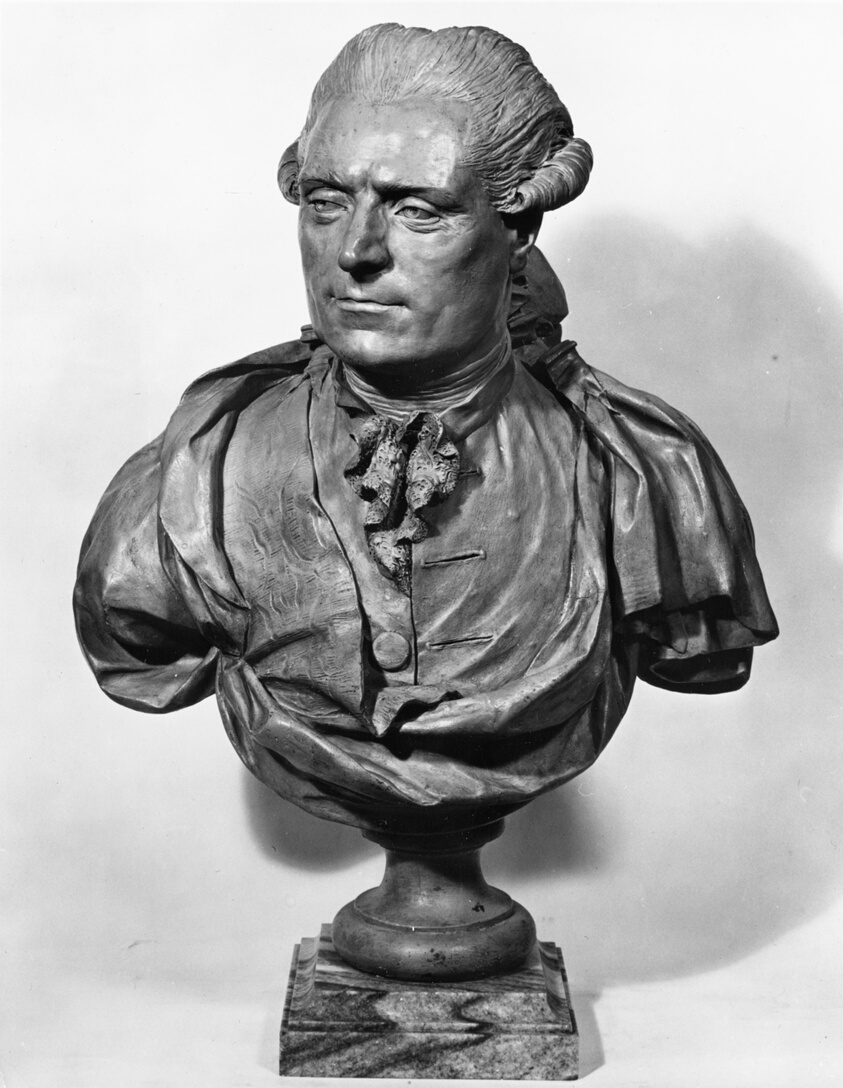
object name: Sculpture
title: Portrait Bust of an Unknown Man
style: 18th Century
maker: French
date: 1775/85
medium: Painted terracotta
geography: France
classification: bust/head; sculpture; terracotta (sculpture); french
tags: portraits: male subject, busts, man, portrait, portraits